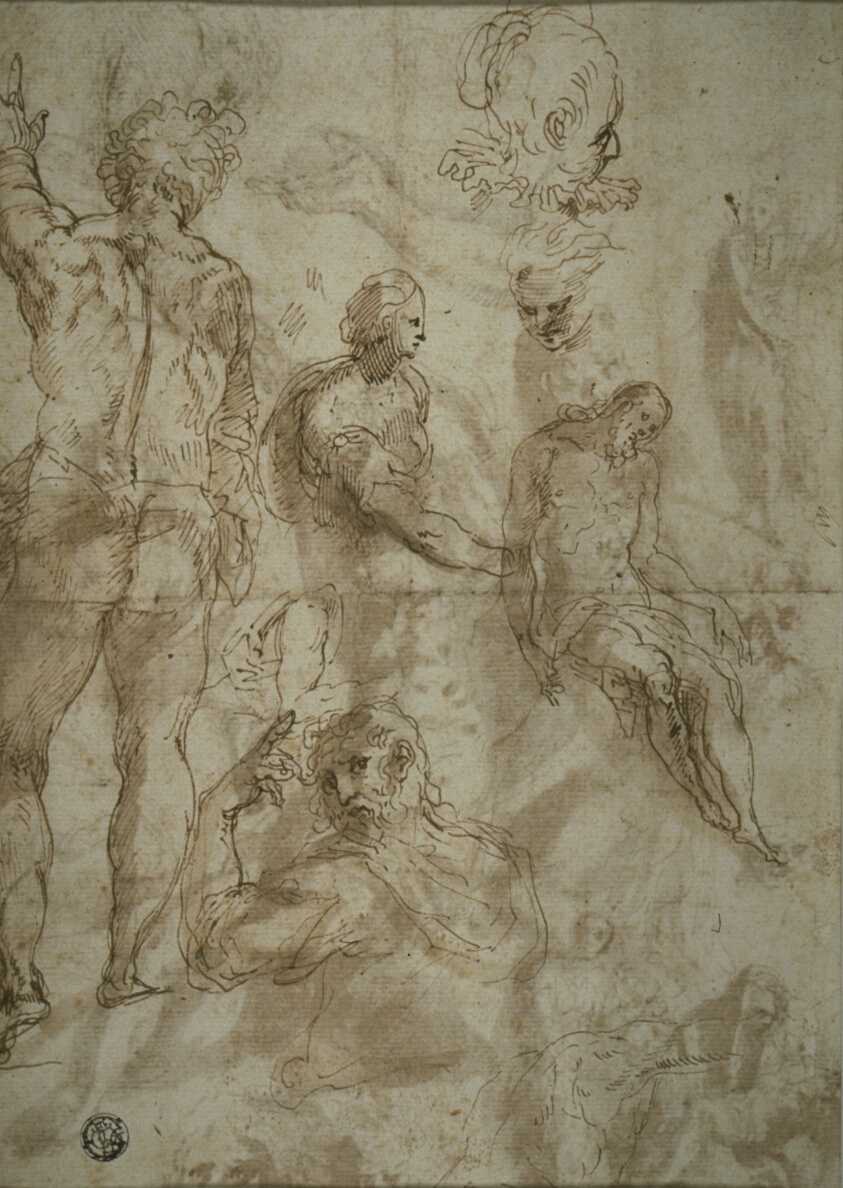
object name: Drawing and Watercolor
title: Sketches for a Lamentation and a Pietà, and of Various Figures, Heads, and an Arm (recto); Sketches of the Dead Christ, and of Various Figures and Heads (verso)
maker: Jacopo Negretti, called Palma il Giovane; Italian, c. 1548-1628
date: 1580 (recto); 1576/80 (verso)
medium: Pen and brown ink with brush and brown wash (recto and verso), on ivory laid paper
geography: Italy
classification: ink with wash; drawings (visual works); prints and drawing